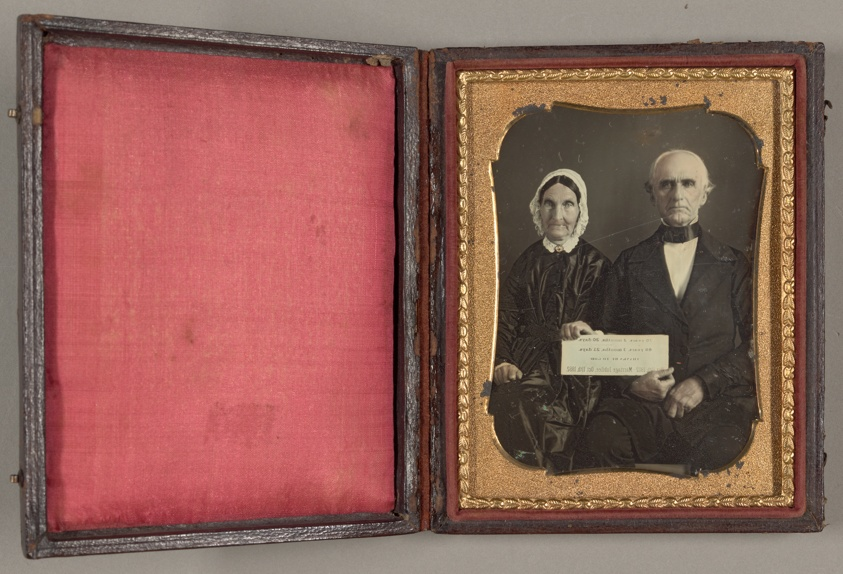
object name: Photograph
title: Untitled (Married Couple)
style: 19th century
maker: Artist unknown; probably American, 19th century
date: 1852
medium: Daguerreotype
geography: United States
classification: daguerreotype; photographic process; photography; portrait; photograph; portrait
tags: portraits, people, photography